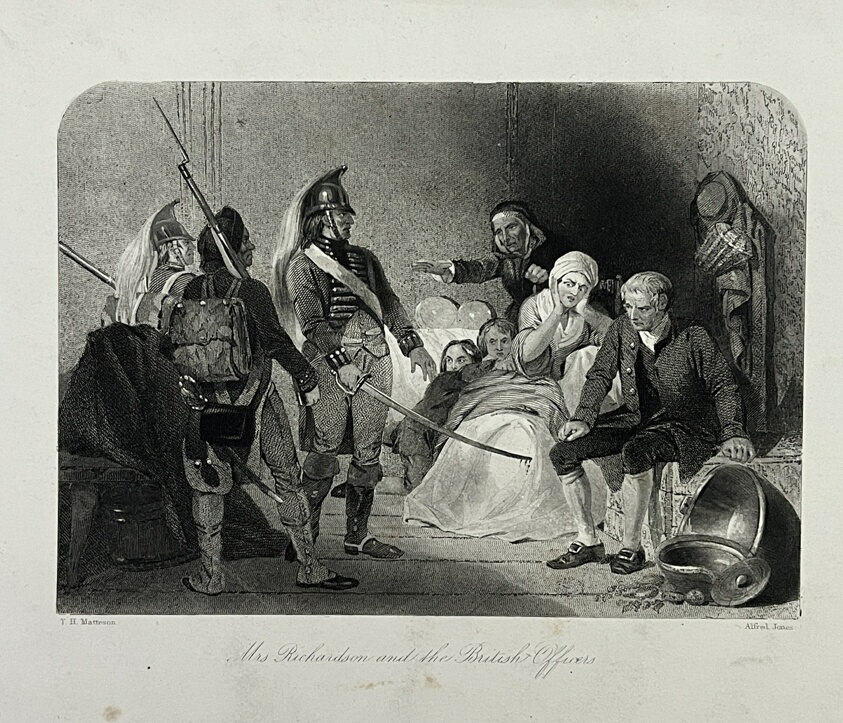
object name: Print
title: Mrs Richardson and the British Officers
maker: Alfred Jones (English, active in America, 1819-1900); after Tompkins Harrison Matteson (American, 1813-1884)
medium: Etching on paper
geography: England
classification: reproduction; print; prints and drawing